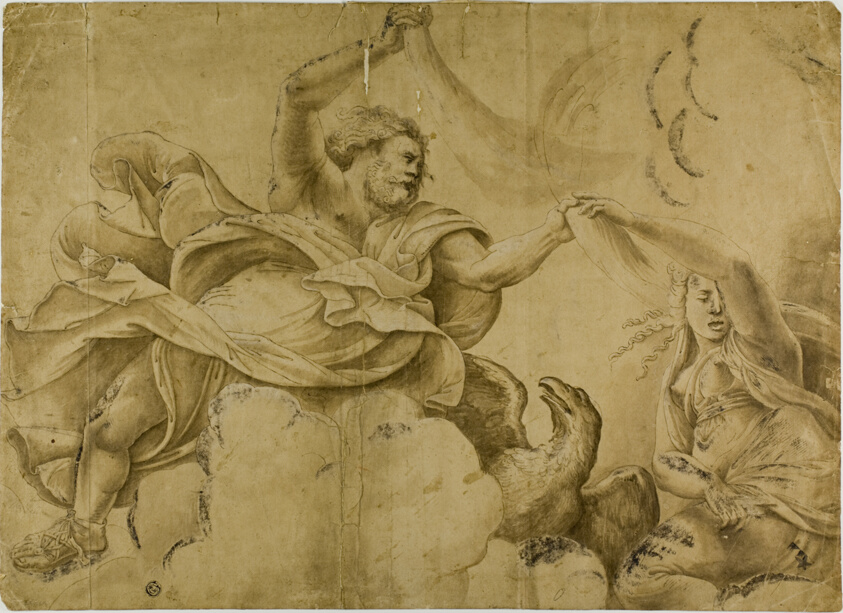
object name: Drawing and Watercolor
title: Study for Jupiter Hurling Thunderbolts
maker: After Giulio Pippi, called Giulio Romano; Italian, c. 1499-1546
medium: Pen and brown ink, with brush and brown wash, heightened with lead white (oxidized), on tan laid paper, laid down on ivory laid paper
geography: Italy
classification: ink with wash; drawings (visual works); prints and drawing